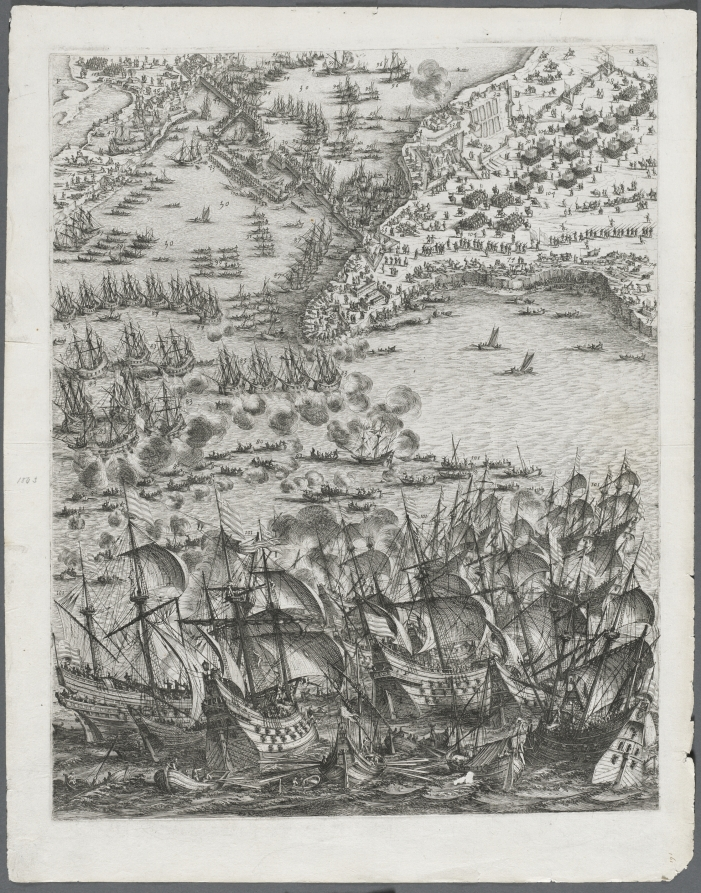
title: The Siege of La Rochelle: Plate 11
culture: France, 17th century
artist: Jacques Callot (French, 1592–1635)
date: 1628–1630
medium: etching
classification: Print